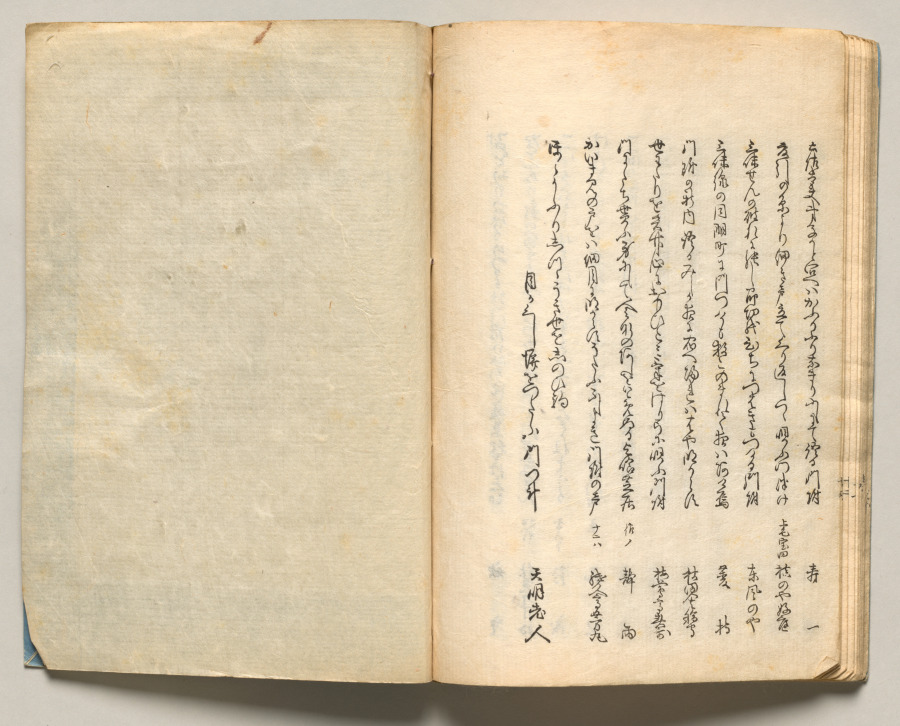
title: Spread Twenty-Three from Volume Three of People of Japan in Light Verse (Kyōka)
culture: Japan, Edo period (1615–1868)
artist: Utagawa Hiroshige (Japanese, 1797–1858)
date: 1857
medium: Woodblock-printed book; ink and color on paper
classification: Bound Volume